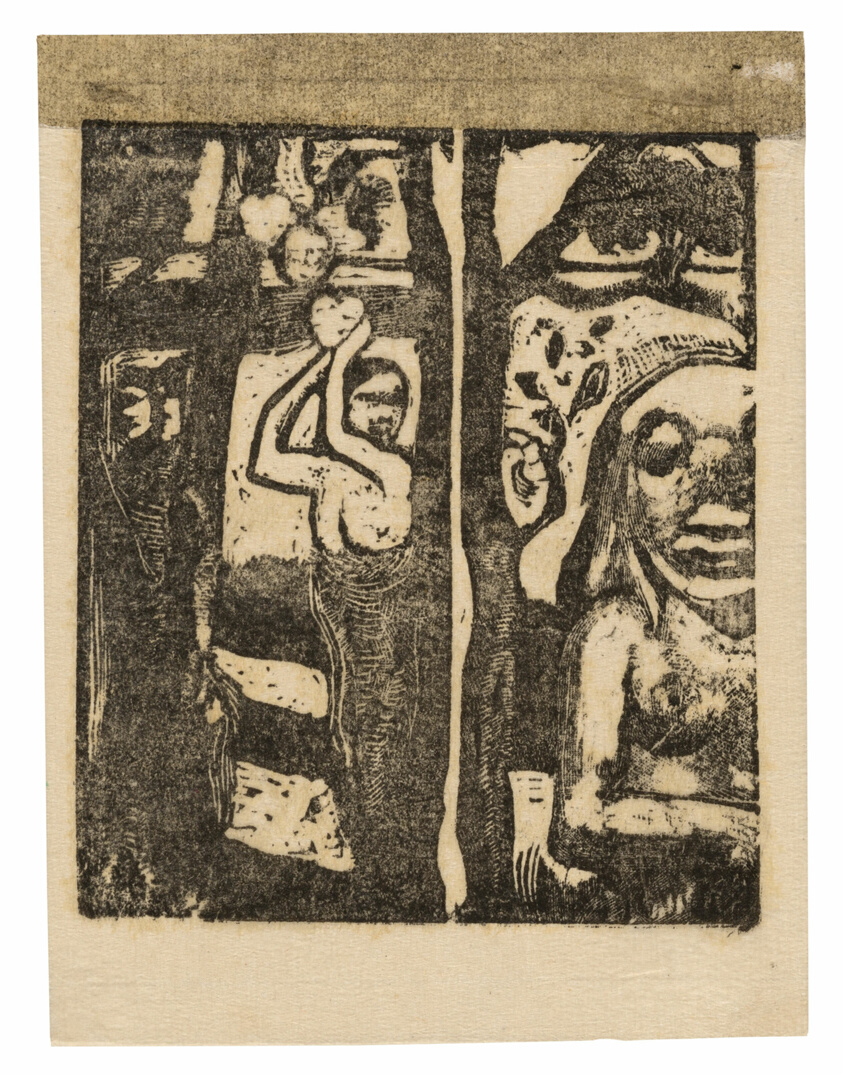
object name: Print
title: Woman Picking Fruit and Oviri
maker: Paul Gauguin (French, 1848-1903)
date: 1895/96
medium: Wood-block print in black ink on thin ivory Japanese paper, tipped on ivory wove paper, laid down on off-white wove plate paper with decorative plate marks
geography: France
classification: woodcut; print; prints and drawing